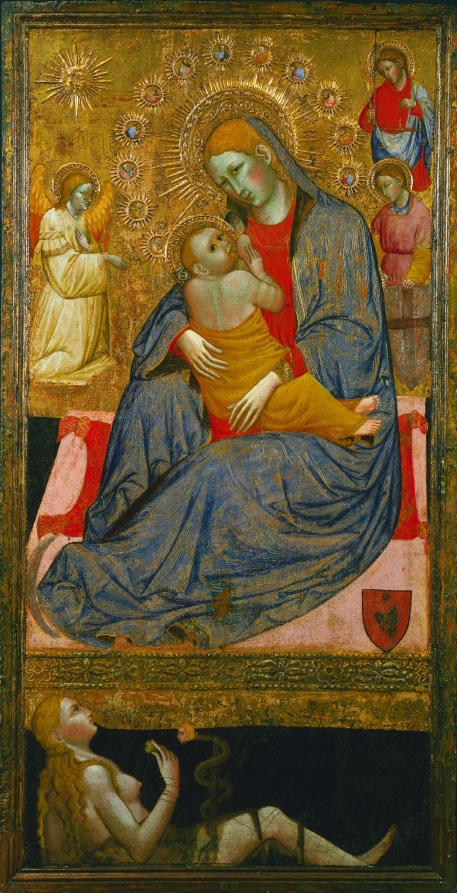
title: The Madonna of Humility with the Temptation of Eve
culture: Italy, the Marches, late 14th-early 15th Century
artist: Olivuccio di Ciccarello (Italian, Marche, 1360/65–1439)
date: c. 1400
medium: tempera and gold on wood panel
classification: Painting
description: The Madonna is seated humbly on the ground nursing her child. Saint George and the Archangels Gabriel and Michael kneel nearby, while Christ’s disciples appear radiating from the Madonna’s halo in the form of stars. In contrast with the Virgin’s purity, Eve lies in the lower part of the painting. Coaxed by the serpent, she raises the forbidden fruit to her mouth, thus condemning humankind through her original sin. The juxtaposition of these two images affirms the Incarnation and the role of Christ and the Virgin in the redemption story. The deep scratches on the surface of the panel, especially on the serpent’s face and Eve’s wrist, likely resulted from a zealous Christian’s symbolic attack on the power of evil. The artist, Olivuccio di Ciccarello, is known to have been active in the Marche in central Italy. Little is known of his life except that he was an important and prolific painter in Ancona, where he died. His paintings were formerly attributed to Carlo da Camerino, an apparently nonexistent artist, on the basis of a mistaken reading of his signature on a crucifix.